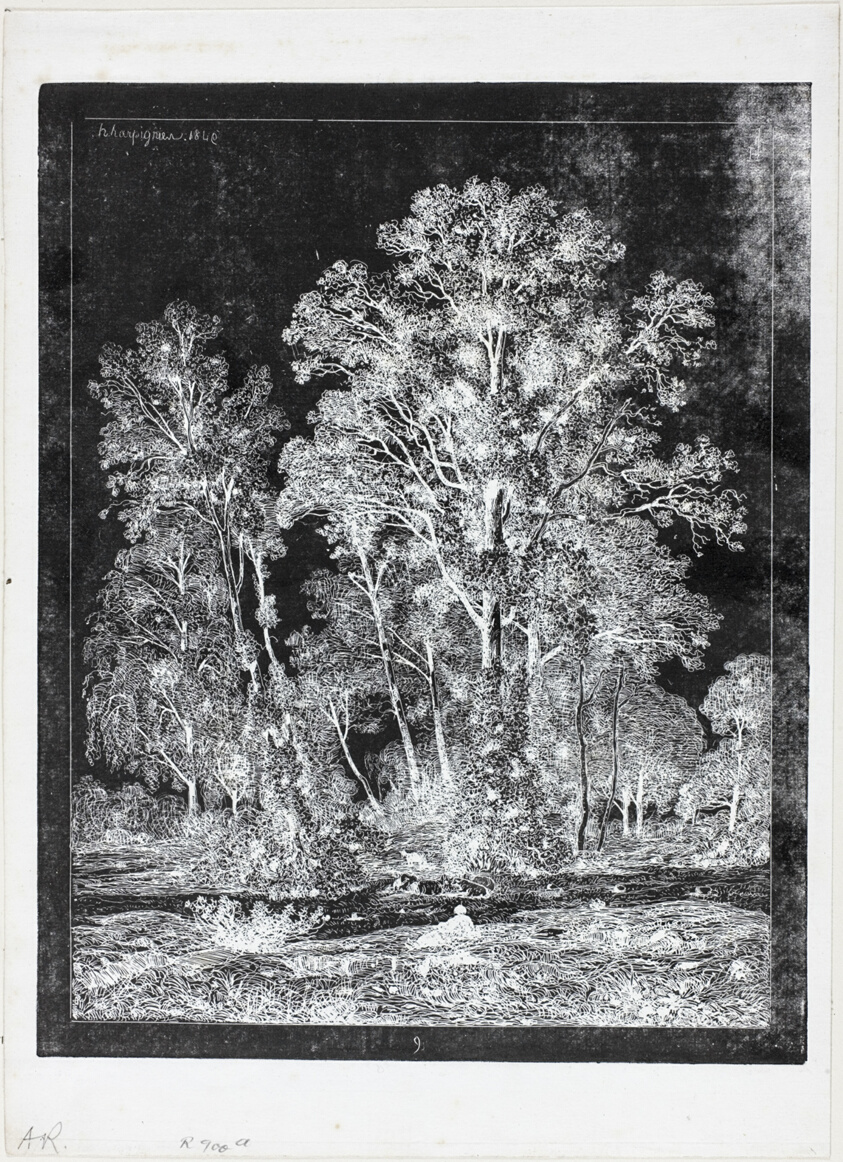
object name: Print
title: Shepherd Resting in a Clearing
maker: Henri Joseph Harpignies (French, 1819-1916)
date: 1849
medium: Etching printed in relief on ivory wove paper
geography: France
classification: etching; print; prints and drawing